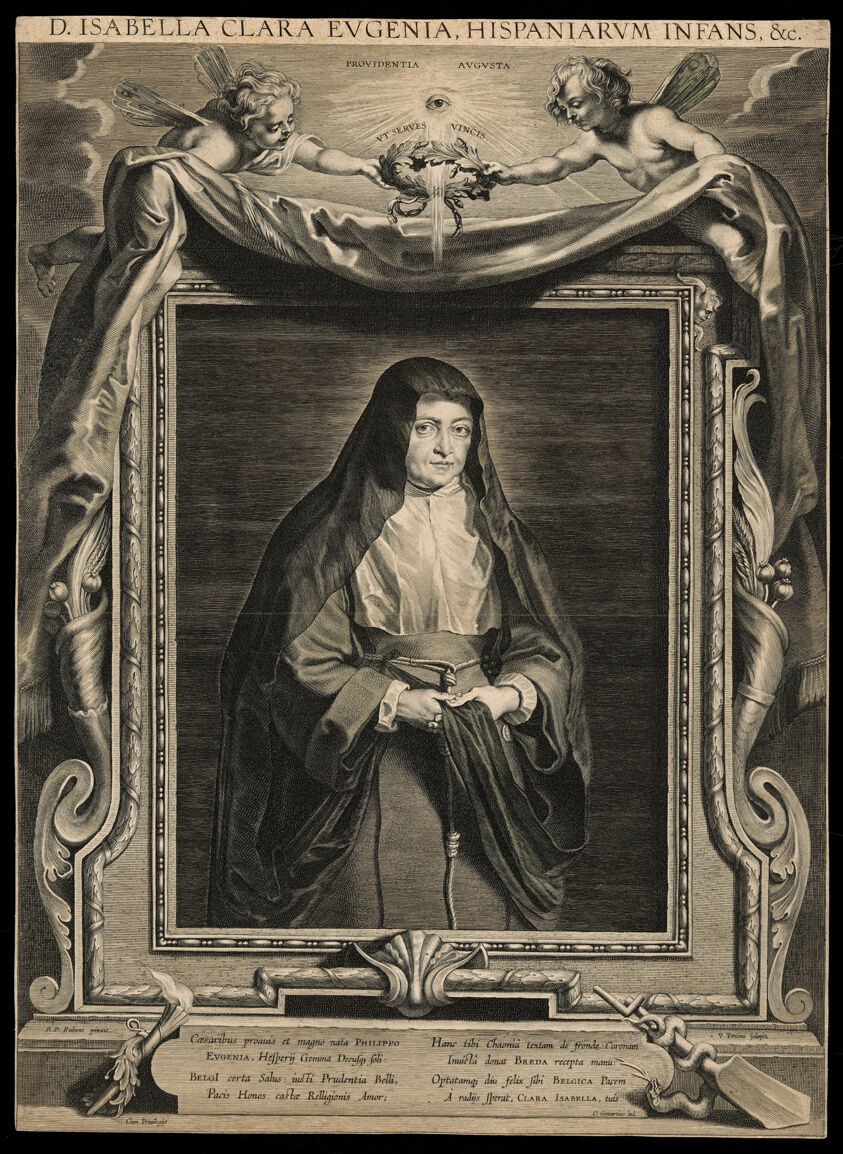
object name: Print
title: Isabella Clara Eugenia (1566-1633)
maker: Paulus Pontius (Flemish, 1603-1658); after Peter Paul Rubens (Flemish, 1577-1640)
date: 1625/33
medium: Engraving in black on cream laid paper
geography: Flanders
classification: engraving; paper; print; prints and drawing